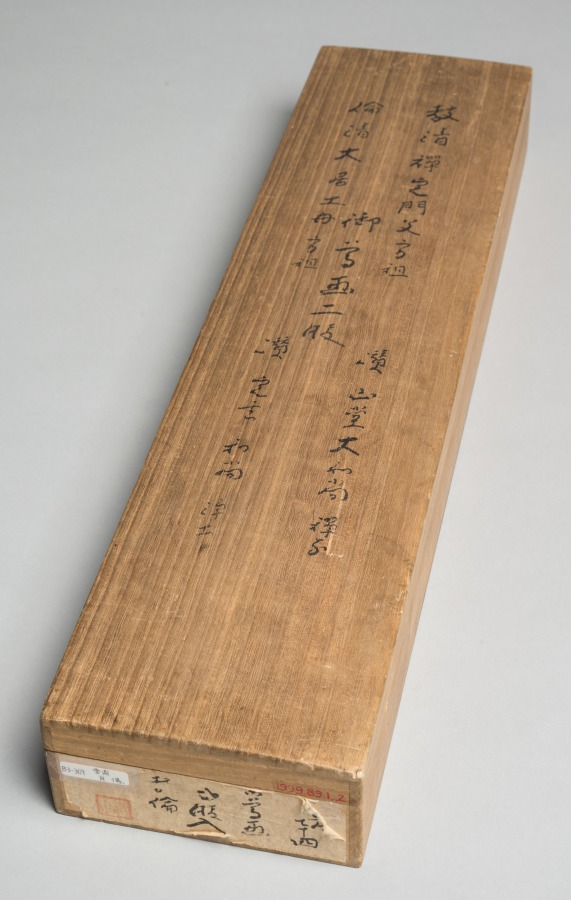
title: Pair of Portraits of Samurai-Officials: Hirai Kyosei and Hirai Rinsei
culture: Japan, Edo period (1615–1868)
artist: Sando Hyosho (Japanese)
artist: Tsukioka Settei (Japanese, 1710–1786)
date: 1776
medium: hanging scrolls; ink and color on silk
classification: Painting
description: In this pair of figure paintings, the artist provided generational portraits of two clan leaders from the Hirai family, accompanied by lengthy inscriptions in a distinctive calligraphic style from separate scholar-officials.